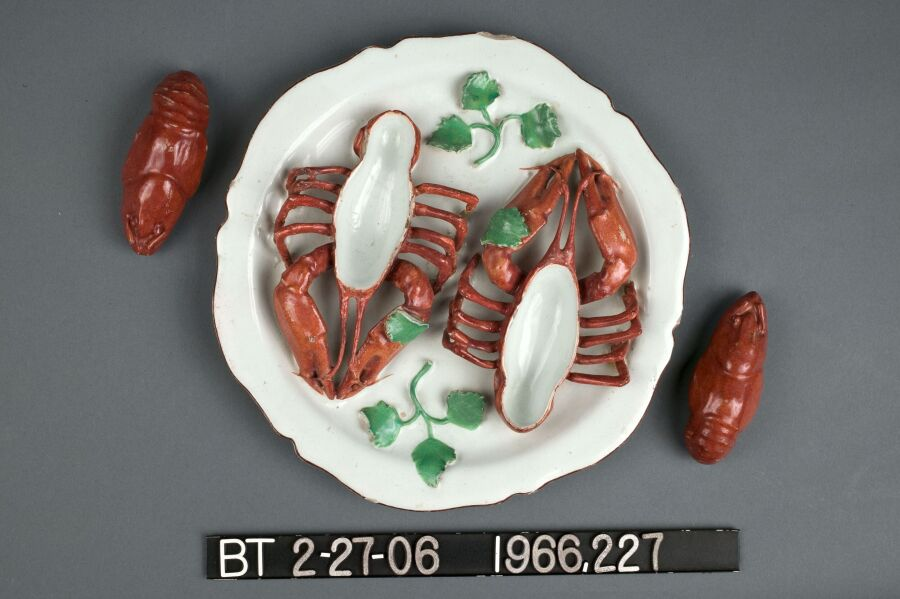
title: Plate with Crayfish and lid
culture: France, Strasbourg, 18th century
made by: possibly by Strasbourg Factory (France)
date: 1750–1775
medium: faience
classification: Ceramic